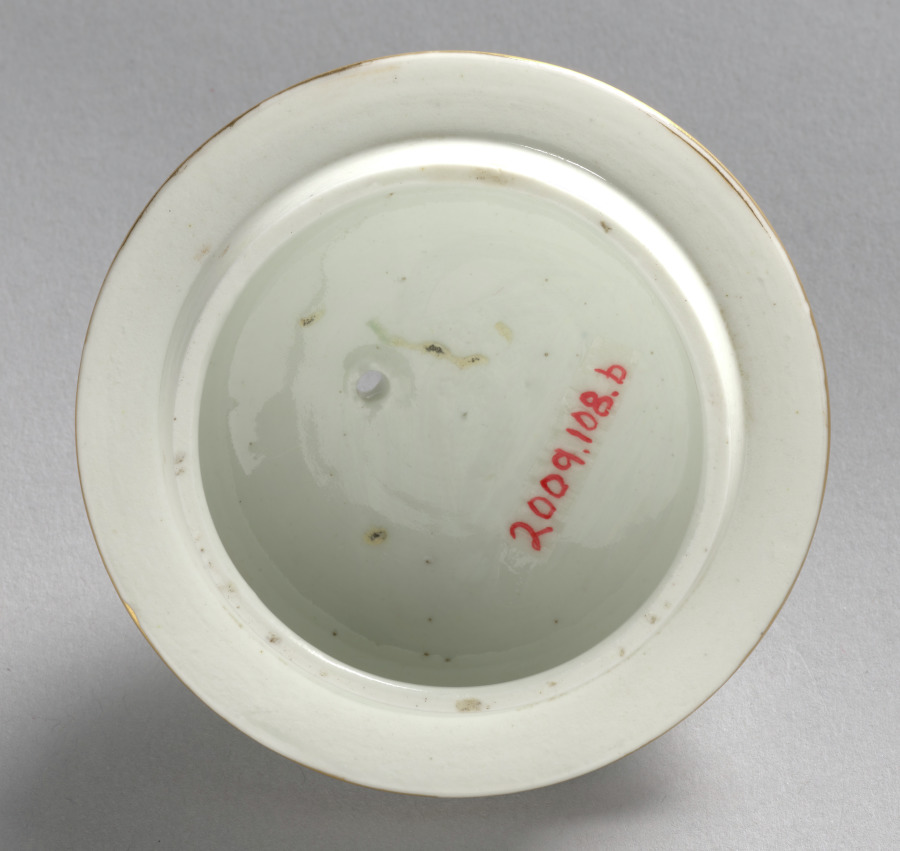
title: Lid for a Teapot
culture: England, Worcester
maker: Worcester Porcelain Factory (British, established 1751)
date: c. 1755–75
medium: porcelain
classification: Ceramic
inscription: Mark on the bottom - An X with radiating lines inside a box.